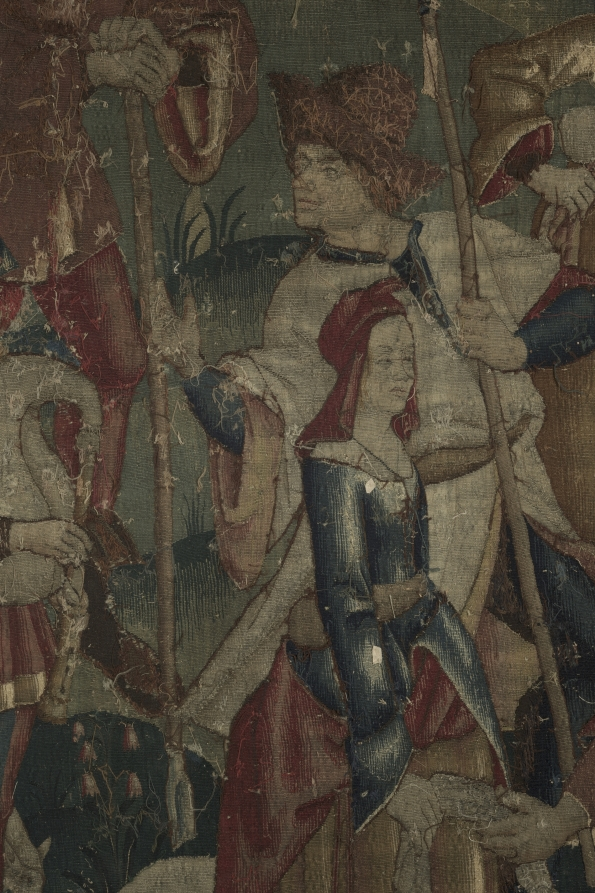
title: Shepherds in a Round Dance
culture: Netherlands, early 16th century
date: around 1500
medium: Wool and silk: tapestry weave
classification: Tapestry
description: Late medieval tapestries often use a limited yet contrasting color palette to portray stylized images. The expressions of these figures, for example, are conveyed more by their postures than by their faces. Four shepherds and shepherdesses join hands and dance to the music of a bagpiper at the far right, while a lord and two ladies on the left look on. A dog and sheep amid blossoming plants and trees contribute to the festive pastoral scene in front of a castle.